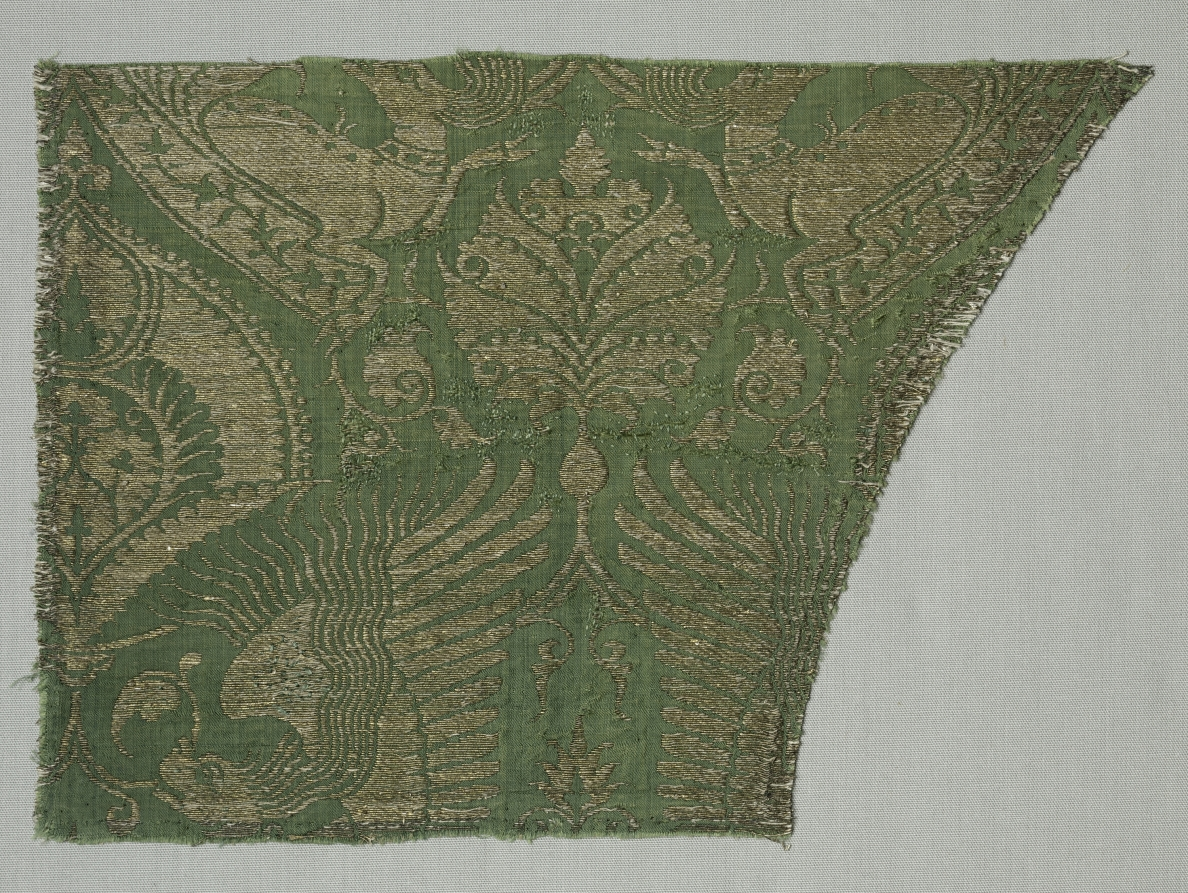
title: Exotic Gold-patterned Silk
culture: Italy, Venice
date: 1360–1400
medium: silk, gold thread; a combination of two weaves, 2/1 twill and 1/3 twill (lampas)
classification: Textile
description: This superb quality silk with radiant gold thread on a rich green ground ranked among the most extravagant textiles woven in Italy during the 1300s. The Italian silk designer combined primarily exotic Chinese and Islamic motifs into the exceptionally dynamic pattern in the international style. Mythical beasts with flaming manes appear amid large palmette leaves. A chasuble in this fabric has survived, hidden during World War II behind a false wall in Saint Mary’s Church in Gdansk, Poland. A remarkably similar silk provides the lavish background in the museum’s painting John the Baptist by the Flemish painter Robert Campin. The display of such luxury continues the practice of using the finest items in the worship of God.